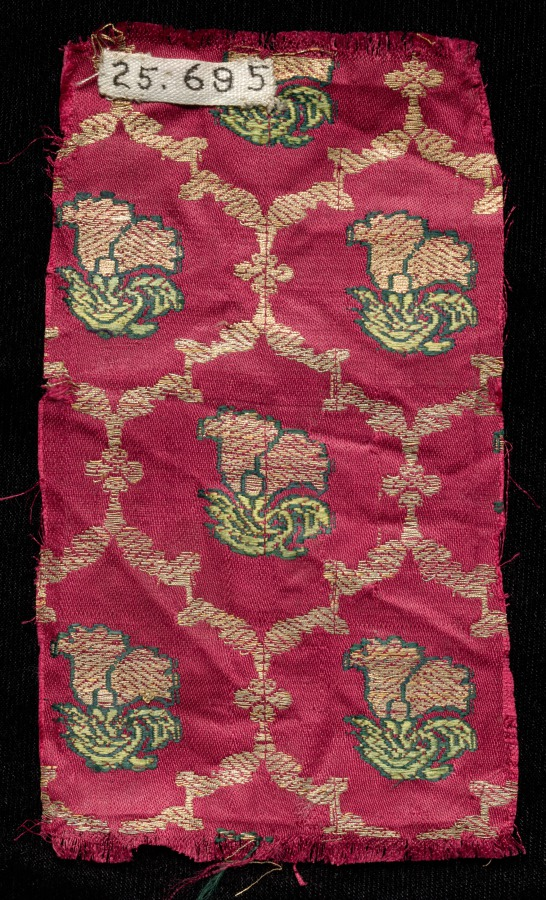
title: Fragment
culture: India, Gulbarga ?, 19th century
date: 1800s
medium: brocade; silk and metal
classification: Textile